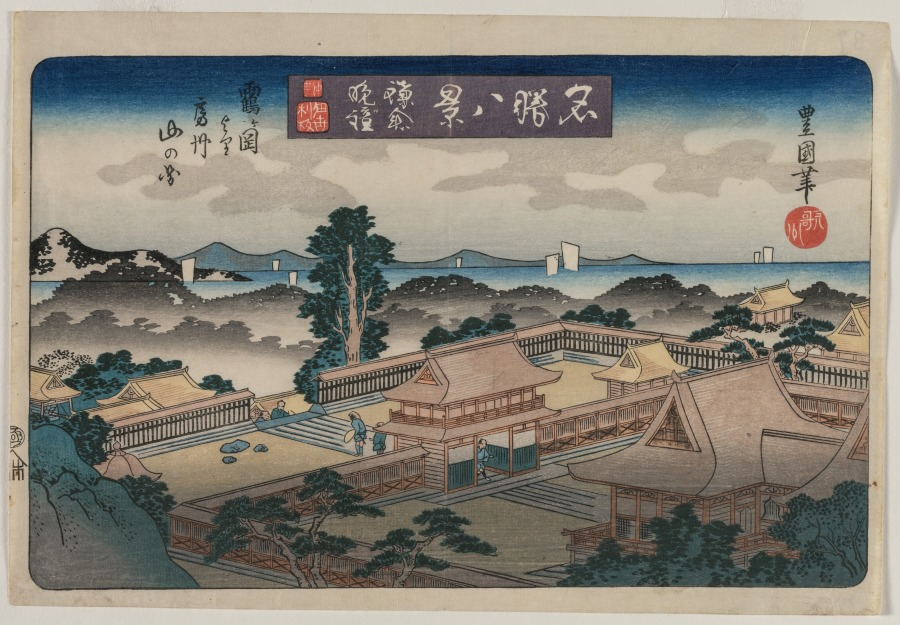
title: Eight Views of Famous Places: Evening Bell in Kamakura: The Mountains in Awa Province from the Hachiman Shrine in Tsurugaoka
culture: Japan, Edo period (1615–1868)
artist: Utagawa Toyokuni II (Japanese, 1777–1835)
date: early 1830s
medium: color woodblock print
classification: Print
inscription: Signature: Toyokuni hitsu. Artist Seal: Utagawa. Publisher: Iseya Rihei (Iseri han, Nakacho, emblem). Censorship Seal: kiwame.